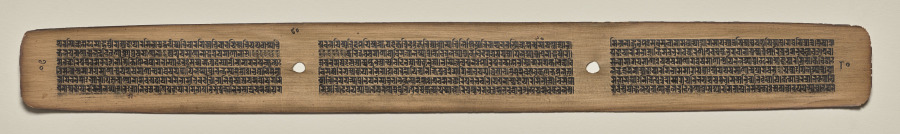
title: Text, Folio 80 (verso), from a Manuscript of the Perfection of Wisdom in Eight Thousand Lines (Ashtasahasrika Prajnaparamita-sutra)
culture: Eastern India, Bihar, Vikramashila Monastery. Painting: Nepal, Kathmandu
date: Sunday, September 14, 1119 (year 239 of the Newar Samvat in the month of Ashvina)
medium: gum tempera and ink on palm leaves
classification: Painting